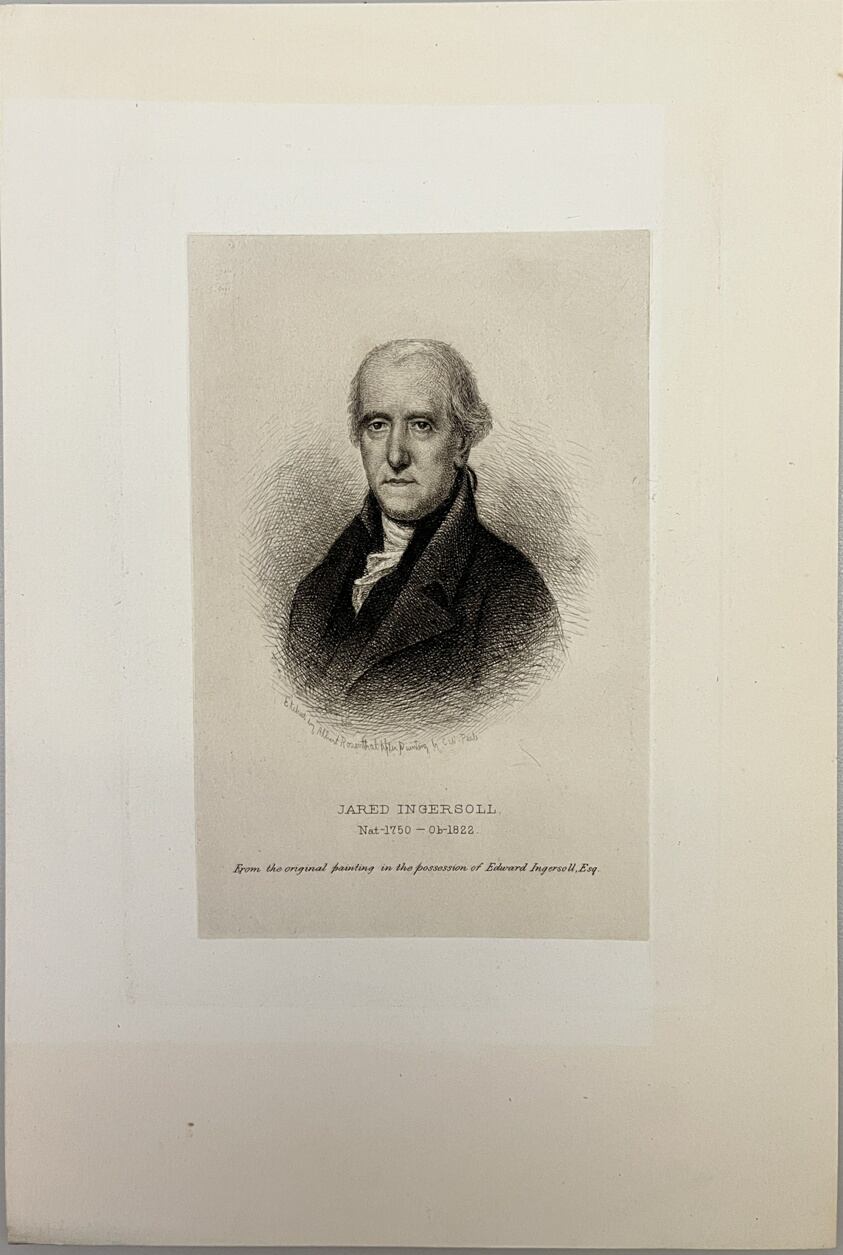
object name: Print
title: Jared Ingersoll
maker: Albert Rosenthal (American, 1863-1939); after Charles Wilson Peale (American, 1741-1827)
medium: Etching on paper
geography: United States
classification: reproduction; print; prints and drawing